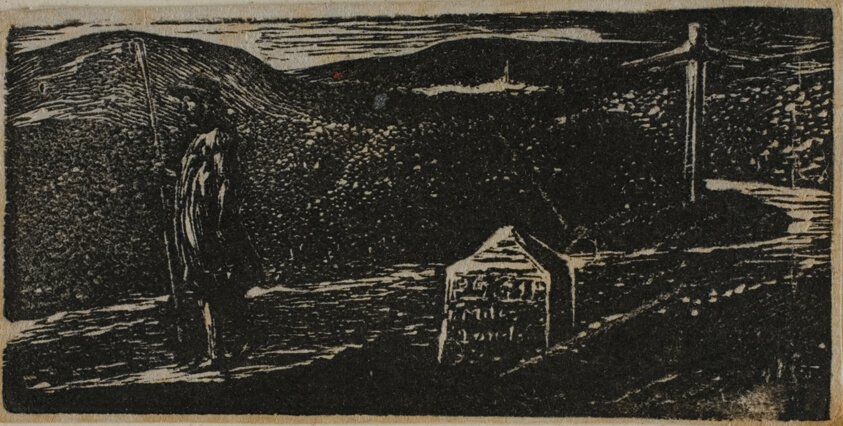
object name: Print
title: Colinet's Journey: Milestone Marked LXII Miles to London, from The Pastorals of Virgil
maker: William Blake (English, 1757-1827)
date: 1821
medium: Wood engraving on off-white wove paper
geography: England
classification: wood engraving; print; prints and drawing; paper